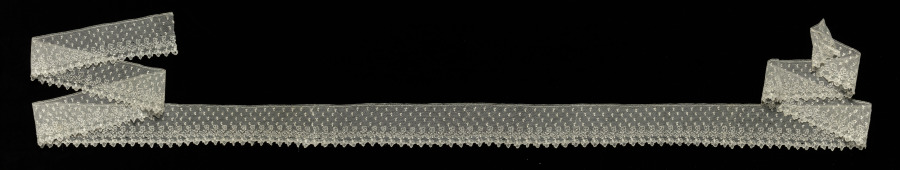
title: Lace Edging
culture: France, Alençon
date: 1774–92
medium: Linen: needle lace (Point d'Alençon)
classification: Lace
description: This piece of lace dates from the reign of Louis XVI, who reigned during 1774–92.